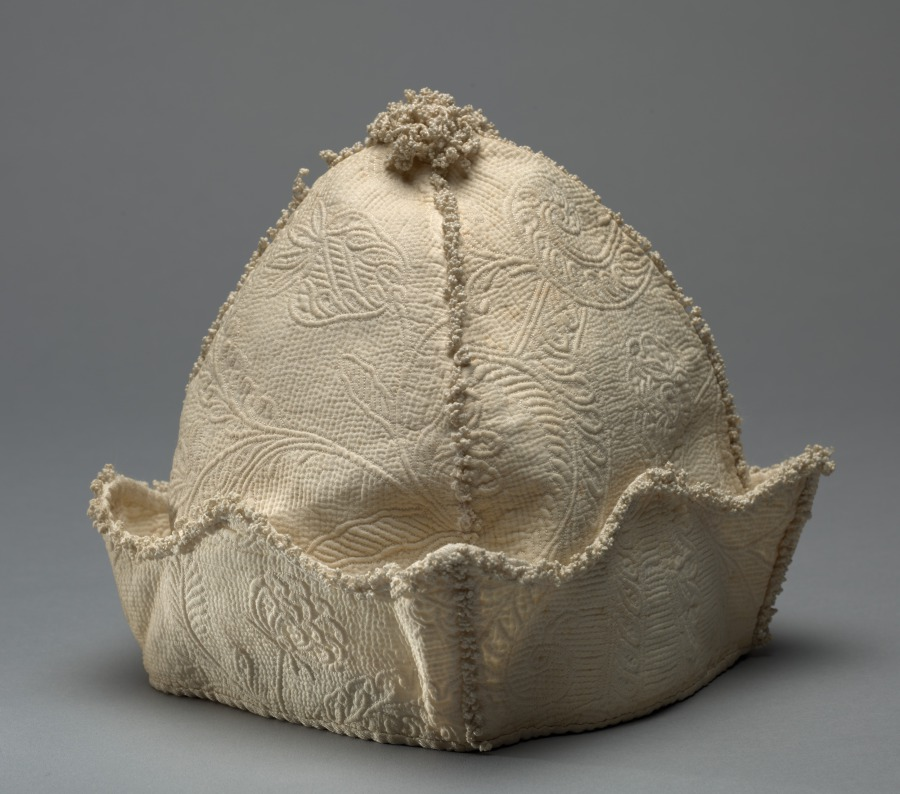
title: Man's Cap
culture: Denmark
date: 1600s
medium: linen with cotton design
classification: Garment